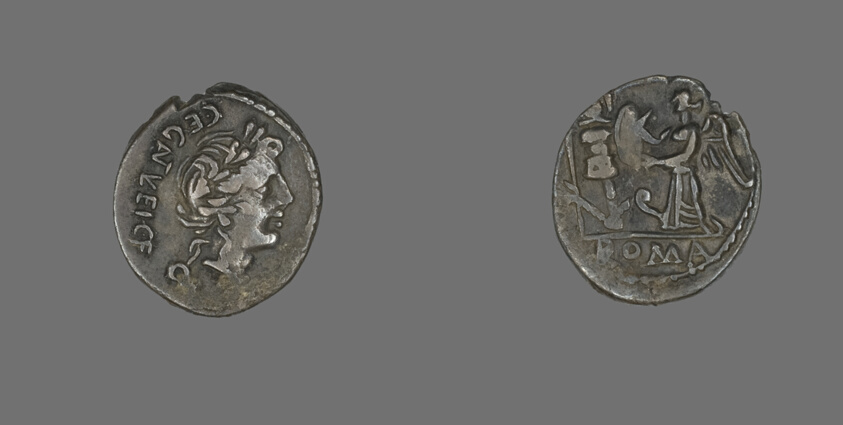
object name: Coin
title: Quinarius (Coin) Depicting the God Apollo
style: roman (ancient, style or period), ancient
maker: Roman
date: about 97 BCE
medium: Silver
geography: Roman Empire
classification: coin; ancient art